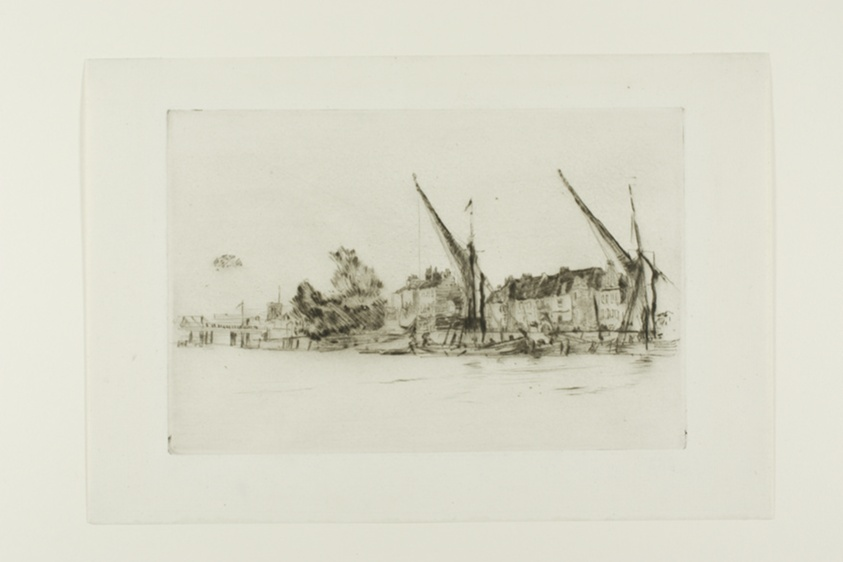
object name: Print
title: Lindsey Houses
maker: James McNeill Whistler (American, 1834-1903)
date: 1876/77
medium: Drypoint in black ink on off-white paper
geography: United States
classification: drypoint; print; prints and drawing; paper